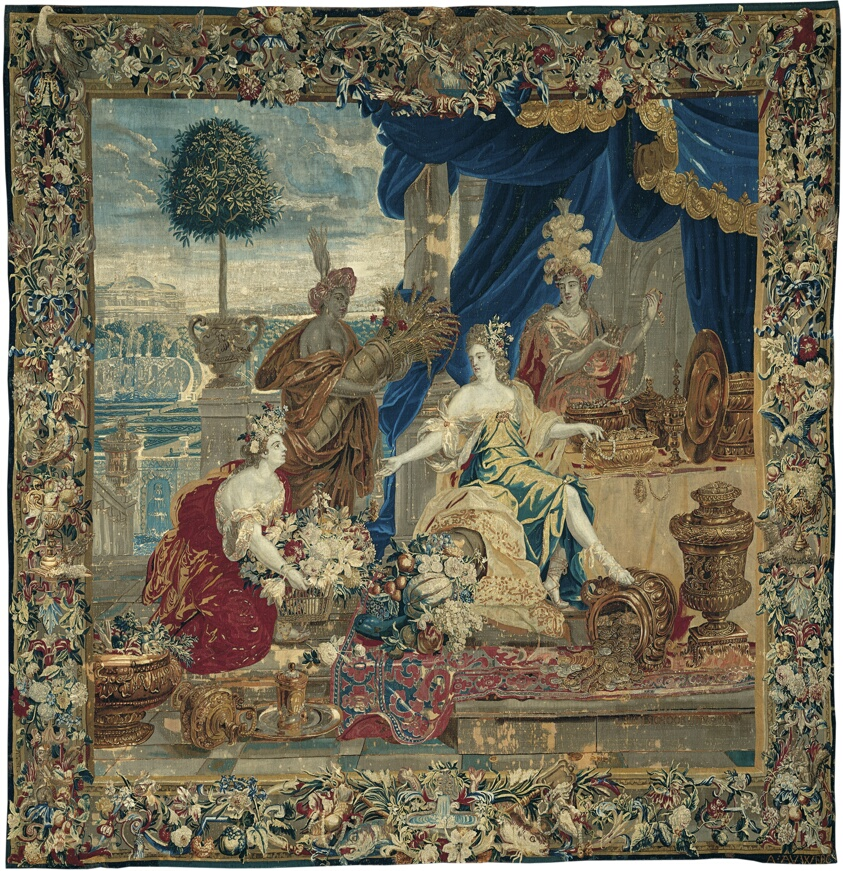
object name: Textile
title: Abundantia, from The Four Continents and Related Allegories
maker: After a cartoon by Lodewijk van Schoor (died 1702) and Pieter Spierinckx (1635–1711); Woven at the workshop of Albert Auwercx (1629–1709); Flanders, Brussels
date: c. 1680/1700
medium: Wool and silk, slit and double interlocking tapestry weave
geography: Brussels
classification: weaving - tapestry; textile